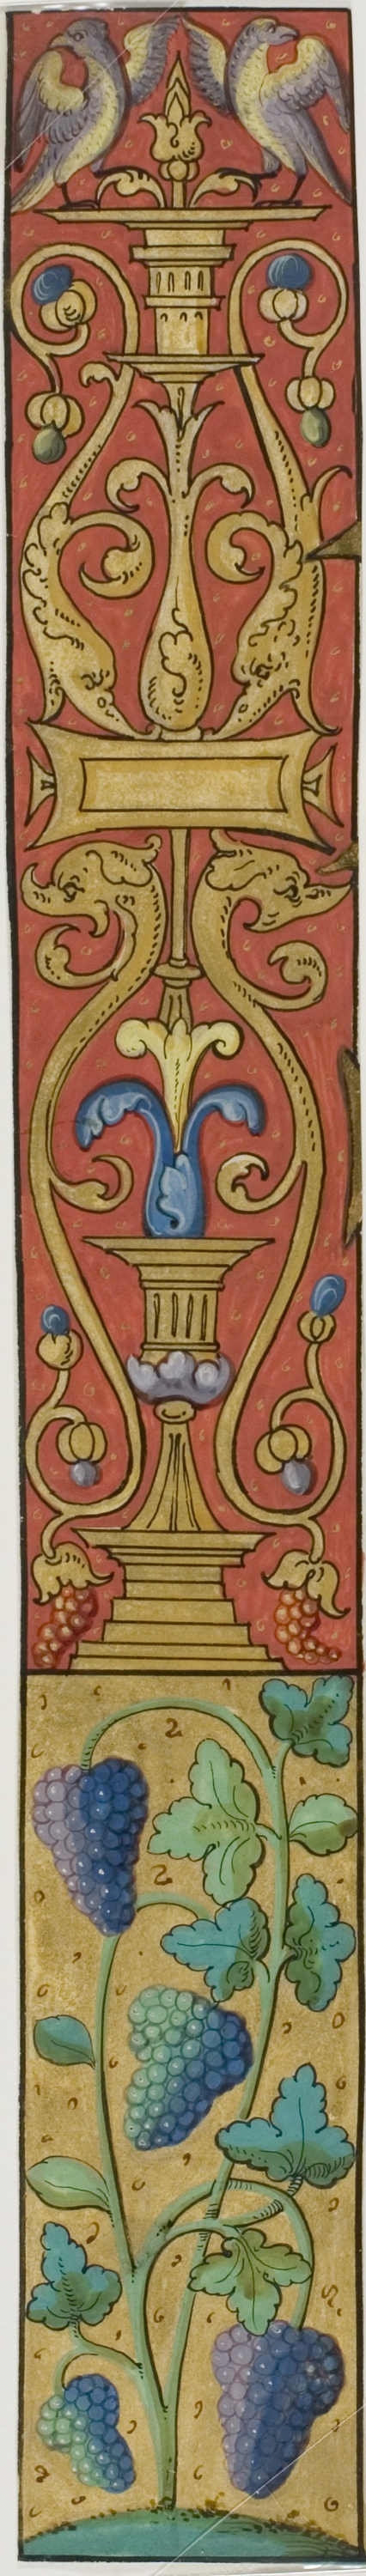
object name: Drawing and Watercolor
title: Illuminated Border with Grapes, Birds and Grotesques from a Manuscript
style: medieval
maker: French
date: 15th or early 16th century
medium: Manuscript cutting in tempera and gold leaf on vellum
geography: France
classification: tempera; manuscript; drawings (visual works); prints and drawing